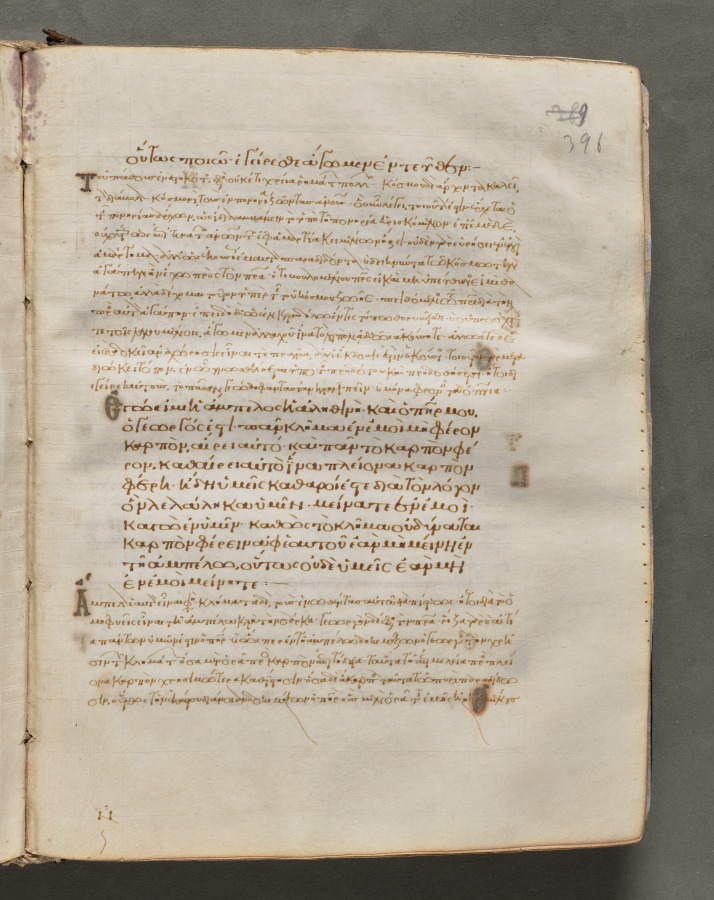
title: Text, folio 396 (recto), from a Gospel Book with Commentaries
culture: Byzantium, Constantinople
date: c. 1000–1100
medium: ink, tempera, and gold on vellum; leather binding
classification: Bound Volume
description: Each of the four gospels in this book opens on a page with brilliantly illuminated borders depicting the author of the text as well as birds—principally peacocks, symbols of the immortality of the soul—and fountains, representing the fountain of life and the salvation of the soul. This volume consists of 428 leaves with texts in Greek. Its level of sophistication suggests that it was probably written and decorated in a monastery in Constantinople.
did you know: Gospel books were carried in procession through Byzantine churches.